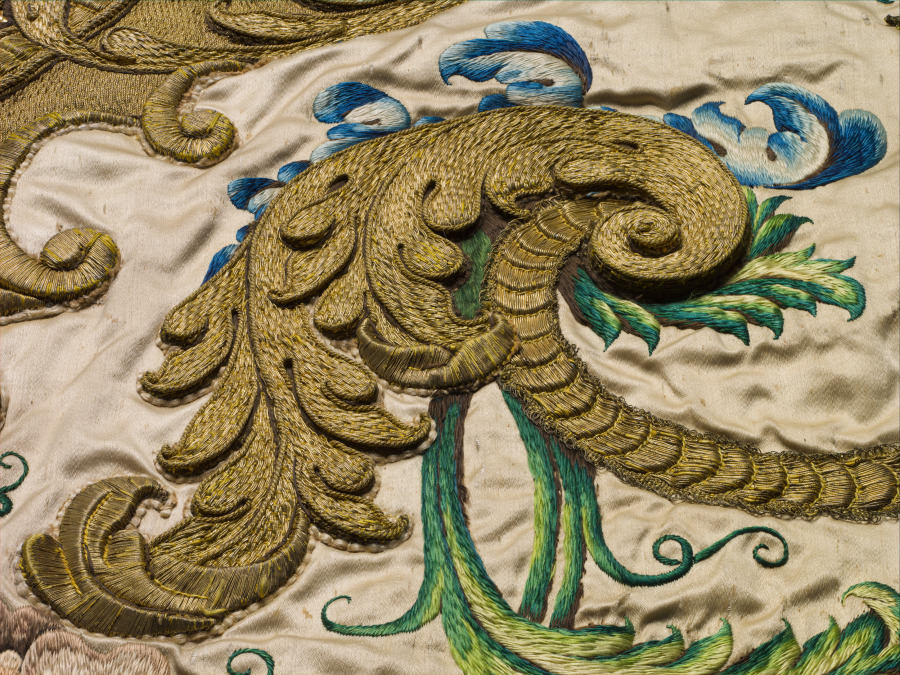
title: Embroidered Front of an Altar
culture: Italy or Spain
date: 1600s–1700s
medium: Satin and silk: embroidery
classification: Embroidery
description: This spectacular cloth with raised three-dimensional embroidery embellished the front of an altar. Lavishly applied gilt-metal thread creates architectural embellishments enhanced by grand vases displaying sheaves of wheat in the upper corners and bunches of grapes in the center of the fringed over-frontal, referring to the bread and wine of the Mass. The central coat of arms represents the Order of the Blessed Virgin Mary of Mercy, a Roman Catholic mendicant order established in 1218 by Saint Peter Nolasco in the city of Barcelona, Spain, then in the principality of Catalonia (crown of Aragon).